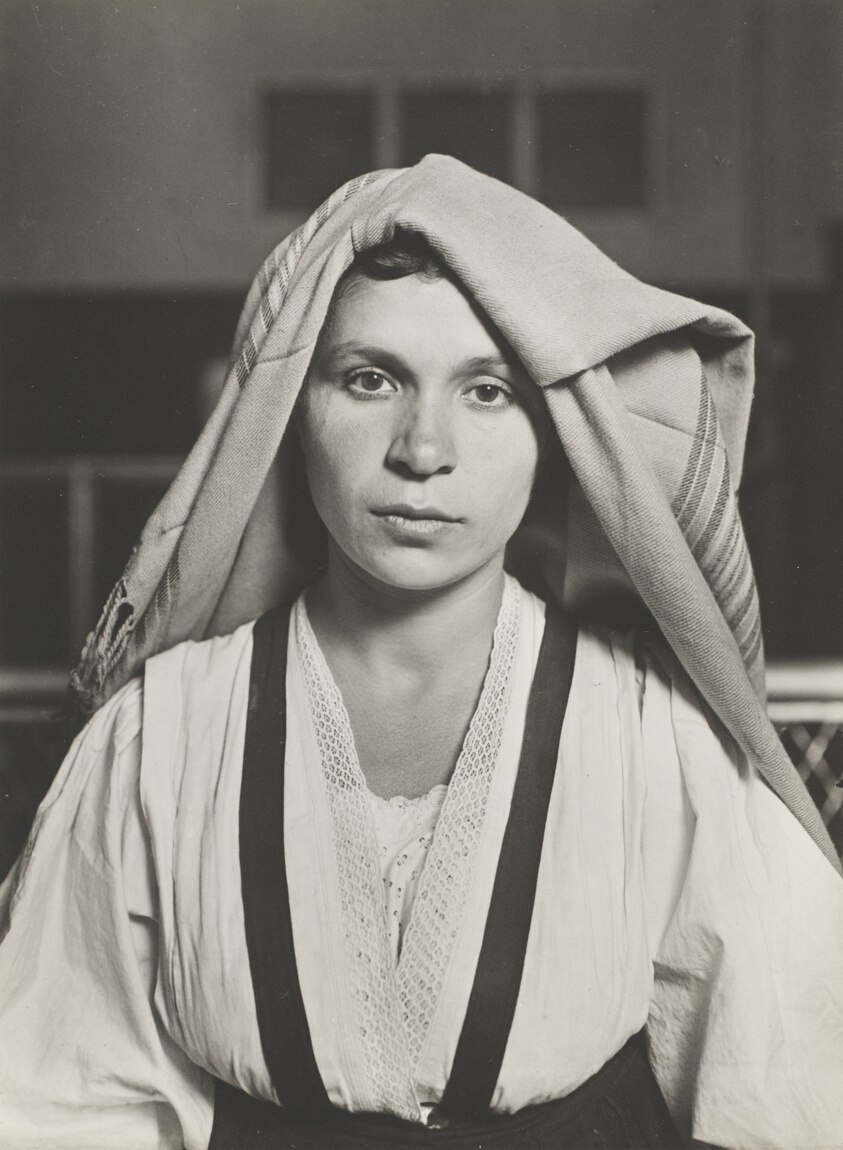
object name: Photograph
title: Italian Immigrant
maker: Lewis Wickes Hine (American, 1874–1940)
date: 1905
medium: Gelatin silver print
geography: United States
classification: gelatin silver (developing-out-paper) pr; photographic process; photography; photograph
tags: Collected by Hugh Edwards